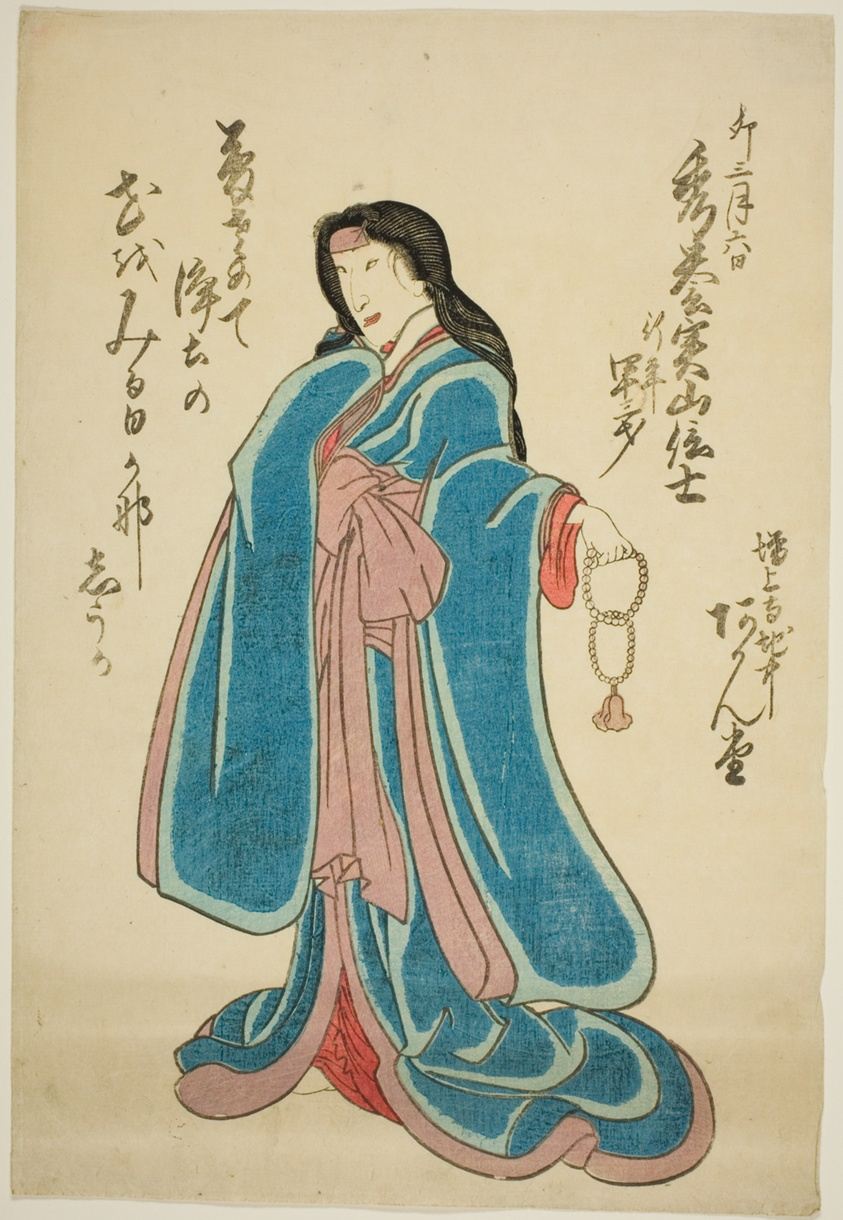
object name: Print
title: Memorial Portrait of the Actor Bando Shuka I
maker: Utagawa School (Japanese, 19th century)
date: 1855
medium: Color woodblock print; oban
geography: Japan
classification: print; asian art